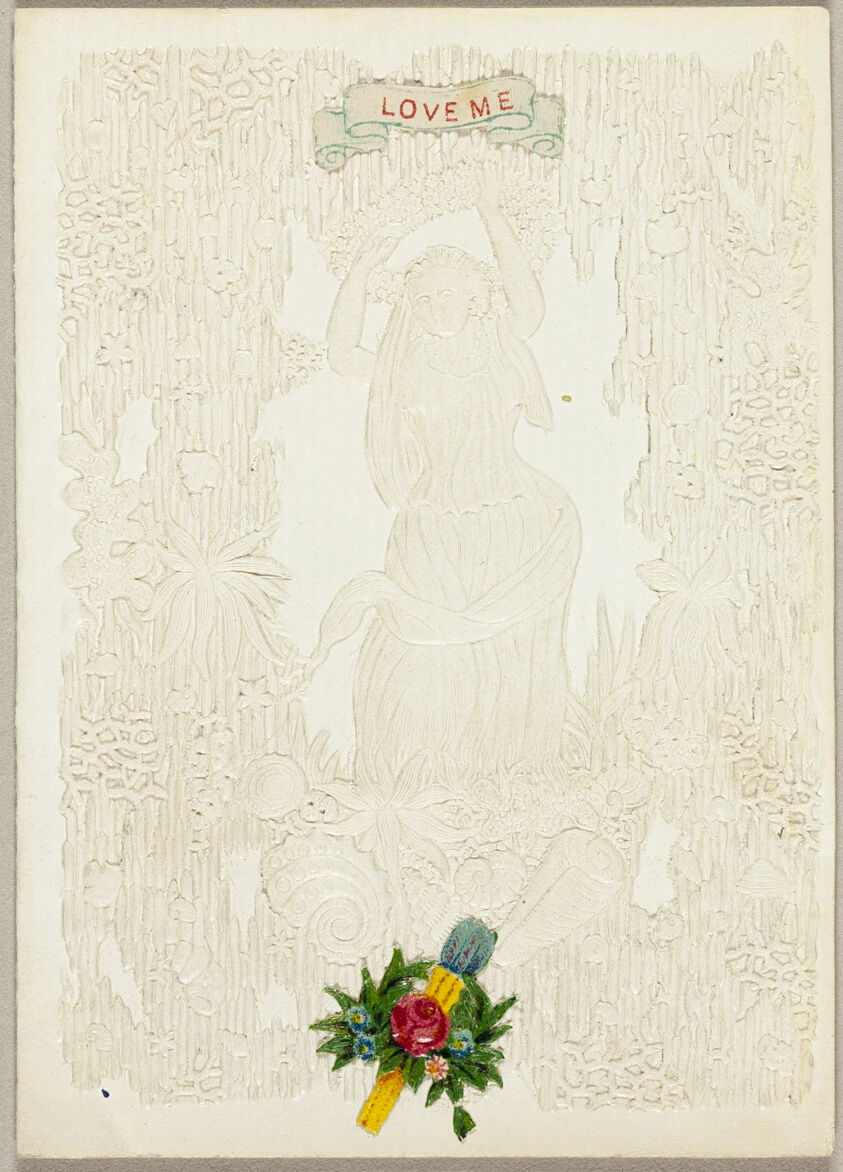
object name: Drawing and Watercolor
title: Love Me (Valentine)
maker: Unknown Artist; American or English, 19th century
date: 1860/70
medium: Collaged elements on embossed (designed) and coated ivory paper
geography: United States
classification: collage; valentine; prints and drawing; paper